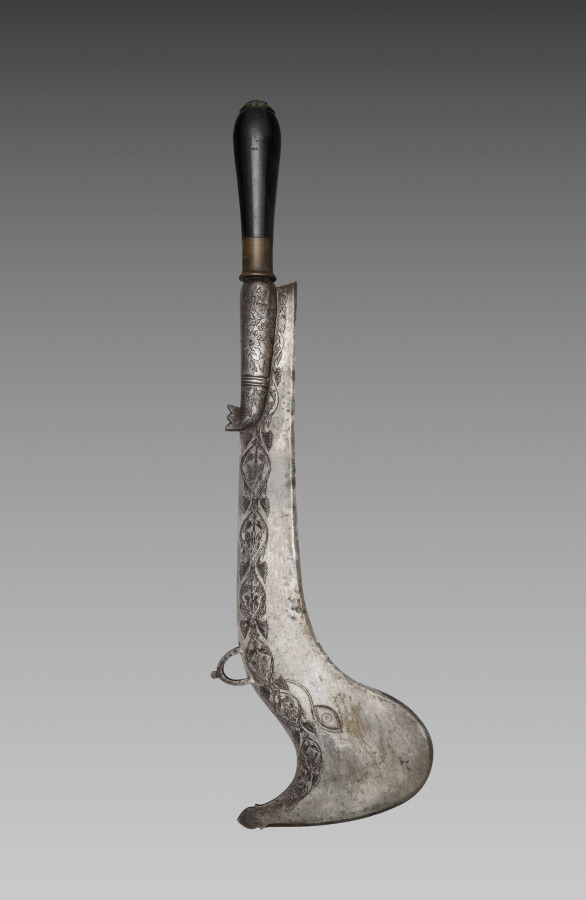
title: Knife or Axe (Kharga)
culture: Nepal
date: 1800s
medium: iron with wooden handle and leather scabbard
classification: Arms and Armor